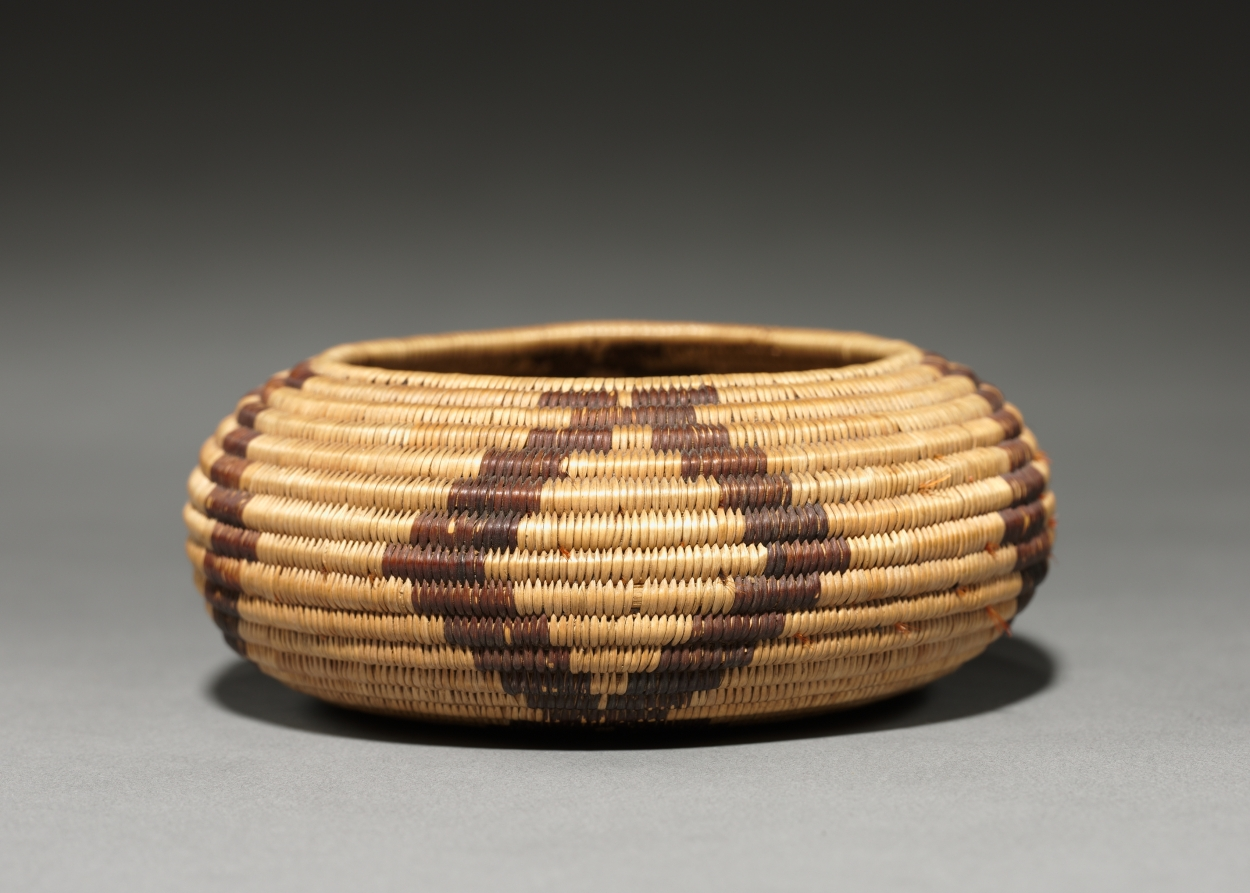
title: Bowl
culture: California, Pomo, Late 19th- Early 20th century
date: 1890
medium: Undyed Bulrush, Sedge; Coiled (3 rods)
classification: Basketry